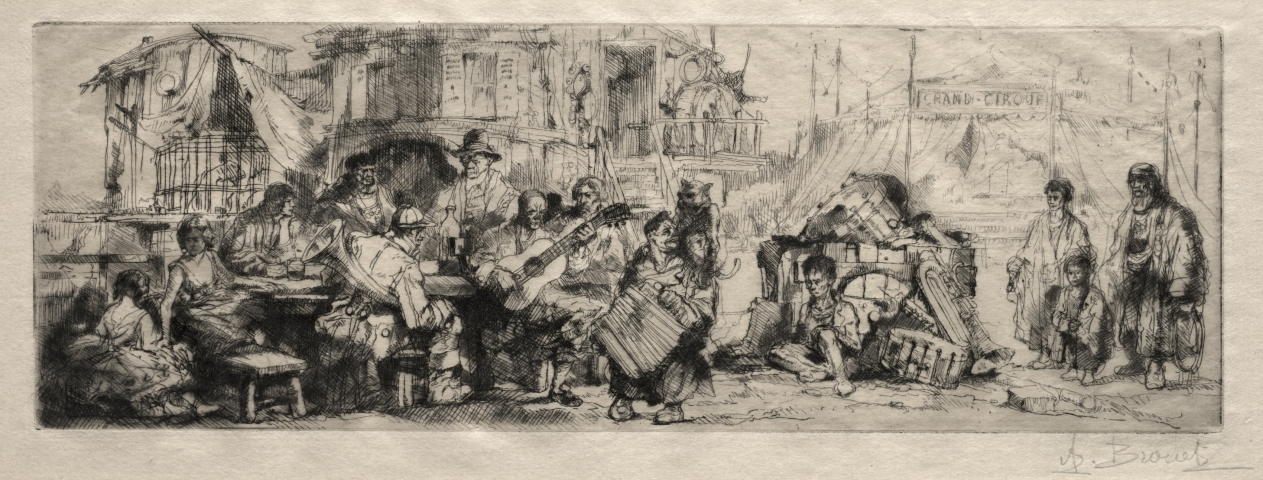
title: Cirque Ambulant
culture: France, 20th century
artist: Auguste Brouet (French, 1872–1941)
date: before 1925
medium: etching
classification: Print